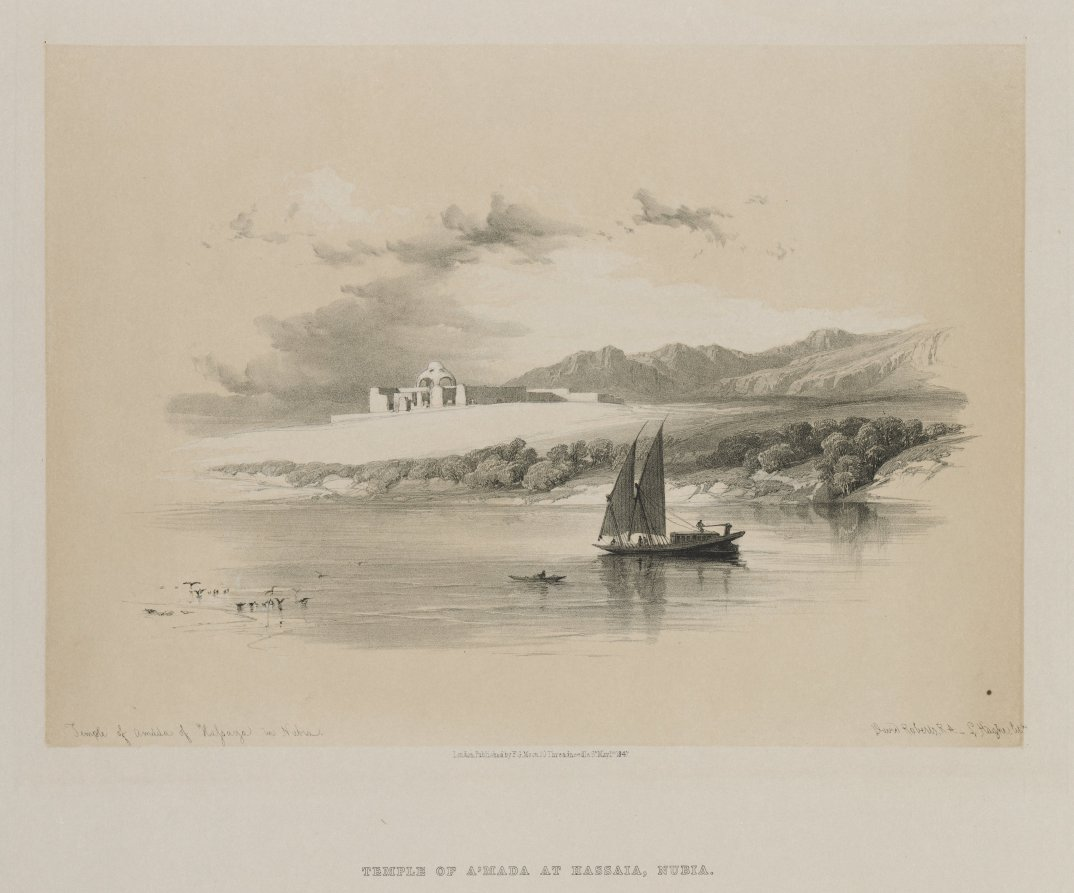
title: Egypt and Nubia, Volume II: Temple of Amdda, of Hassaya in Nubia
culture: England, 19th century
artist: Louis Haghe (British, 1806–1885)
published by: F. G. Moon, 20 Threadneedle Street, London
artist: after David Roberts (Scottish, 1796–1864)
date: 1847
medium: color lithograph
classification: Print